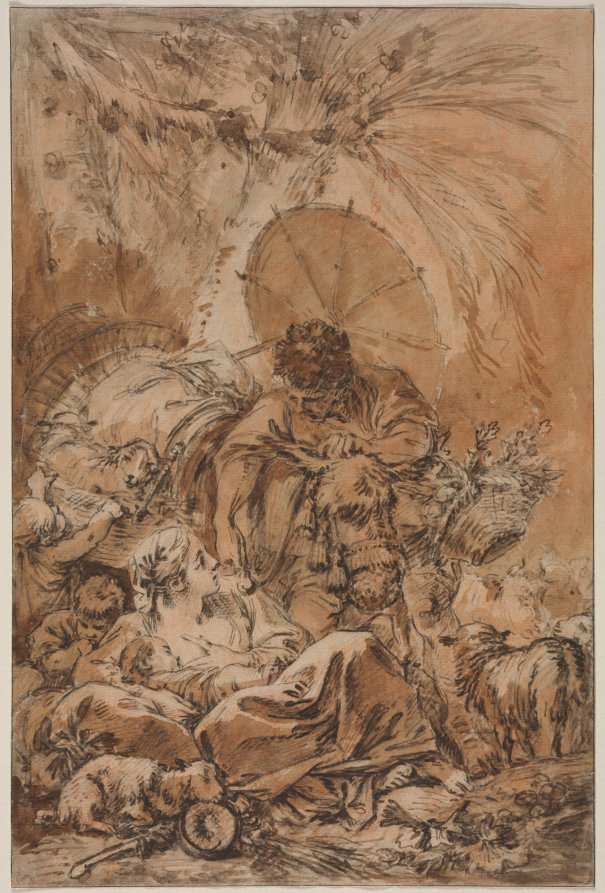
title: The Departure of Jacob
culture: France, 18th century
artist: François Boucher (French, 1703–1770)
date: c. 1755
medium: Pen and brown-black ink, brown ink wash, and red chalk wash, with black chalk on cream laid paper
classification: Drawing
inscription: ON THREE SEPERATELY APPLIED PIECES OF PAPER (now removed and in departmental file), inscribed in black ink: T[illegible] / Dessin à la[illegible] / Boucher - [illegible] / chez Paulme [illegible] 19[illegible] / [illegible] ; printed in black ink: THOS [S superscript] AGNEW & SONS LTD [TD superscript] / Nº 44133 / LONDON, / 43 OLD BOND STREET / PICCADILLY, W1X 4BA ; printed in black ink: Place de la Borde, Nº 2, près St [t superscript]-Augustin / ALEXANDRE / JOUANEST / DOREUR / Fabricant de bordures dorées / pour tableaux, estampes, / glaces, gouaches et des- / sins, et se charge de / l'encadrement. / A PARIS.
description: François Boucher was known for romantic, idealized pastoral scenes and produced relatively few religious works. This drawing, however, is believed to relate to the Old Testament story in which Jacob travels to Canaan with his family. Boucher used a limited palette of brown, red, and black to create dramatic shadows and highlights. The family is seen basking in the dappled sunlight that illuminates the mother and her baby as they rest beneath a palm tree. The sheet may have served as a preparatory study for a similar painting by Boucher that is lost today and known only through a reproductive engraving by the printmaker Elisabeth Cousinet-Lempereur.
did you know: The gesture between the couple in this drawing -- in which the man offers the woman a pear -- is seen in several other works by François Boucher.